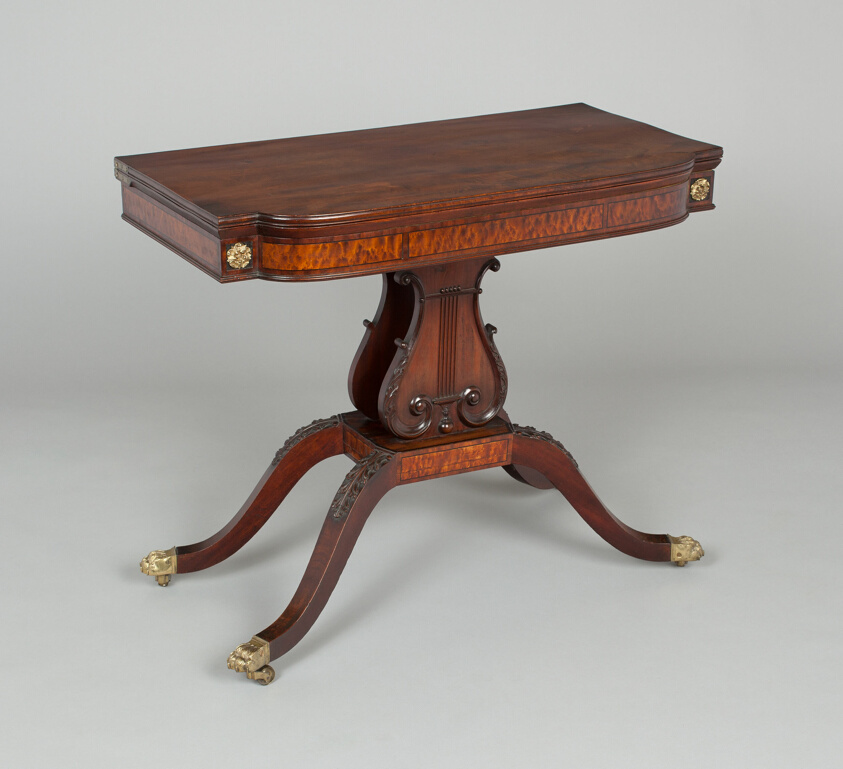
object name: Furniture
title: Card Table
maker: Artist unknown (American, 19th century); Boston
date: 1810–20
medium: Mahogany, bird's eye maple, and leather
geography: Boston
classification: table; furniture; american decorative arts; american arts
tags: furniture